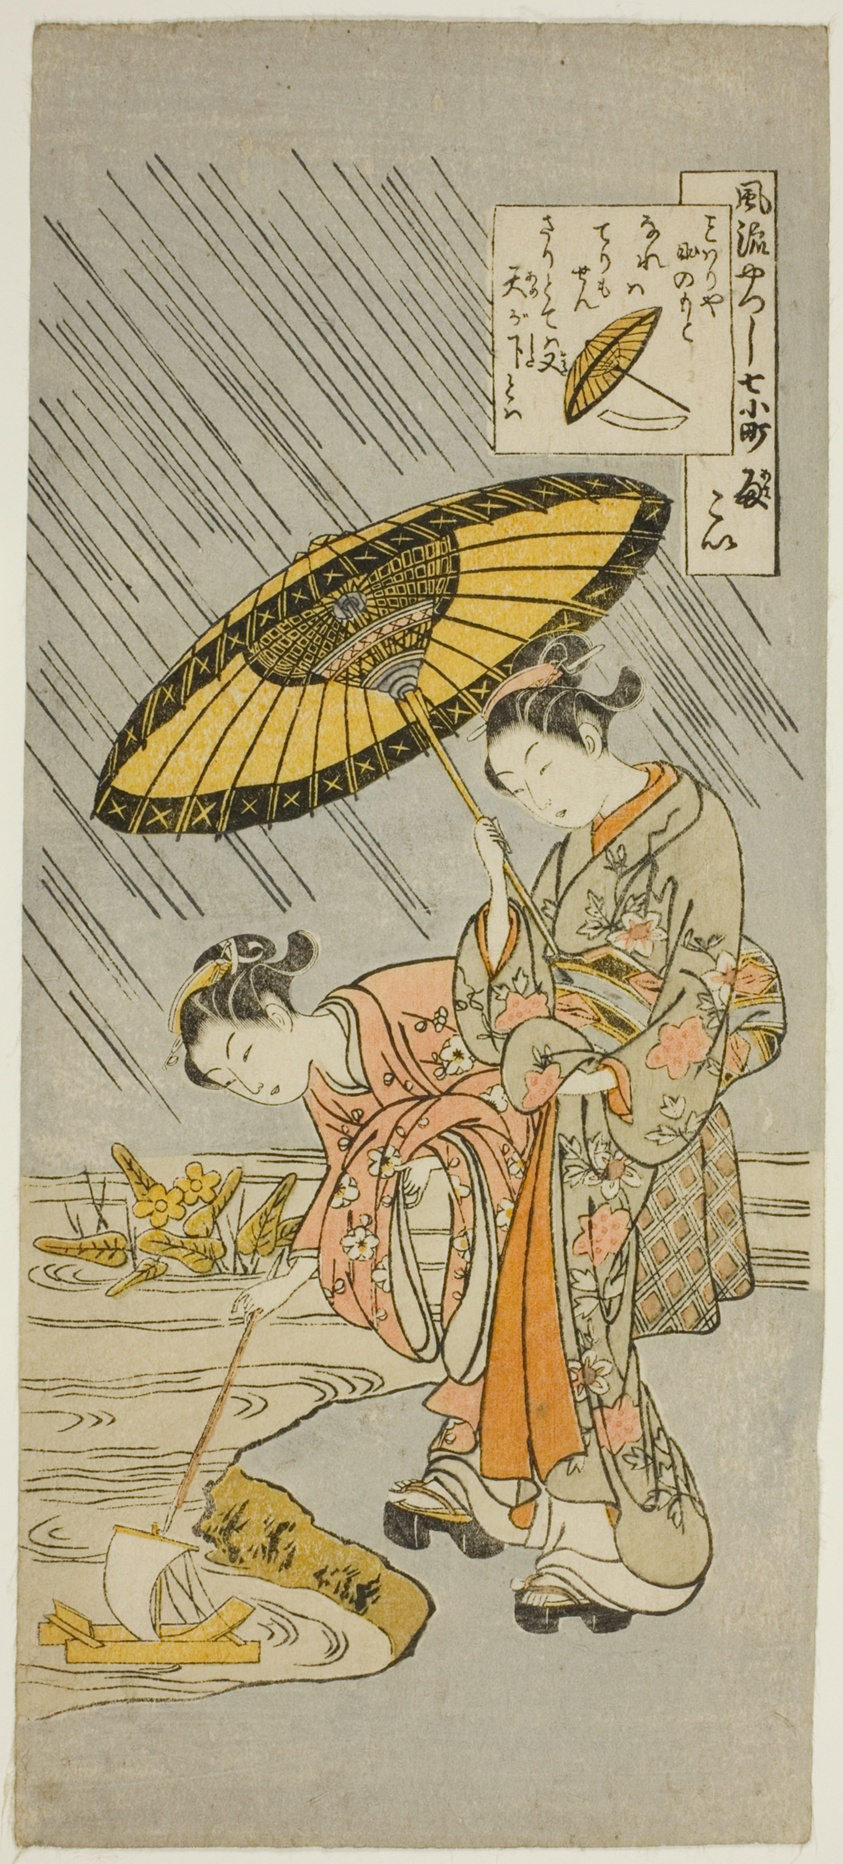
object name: Print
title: Ono no Komachi Praying for Rain (Amagoi), from the series "The Seven Fashionable Aspects of Komachi (Furyu yatsushi nana Komachi)"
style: Japanese (culture or style)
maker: Suzuki Harunobu 鈴木 春信; Japanese, 1725 (?)-1770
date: c. early 1760s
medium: Color woodblock print; hosoban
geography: Japan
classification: woodblock print; print; asian art